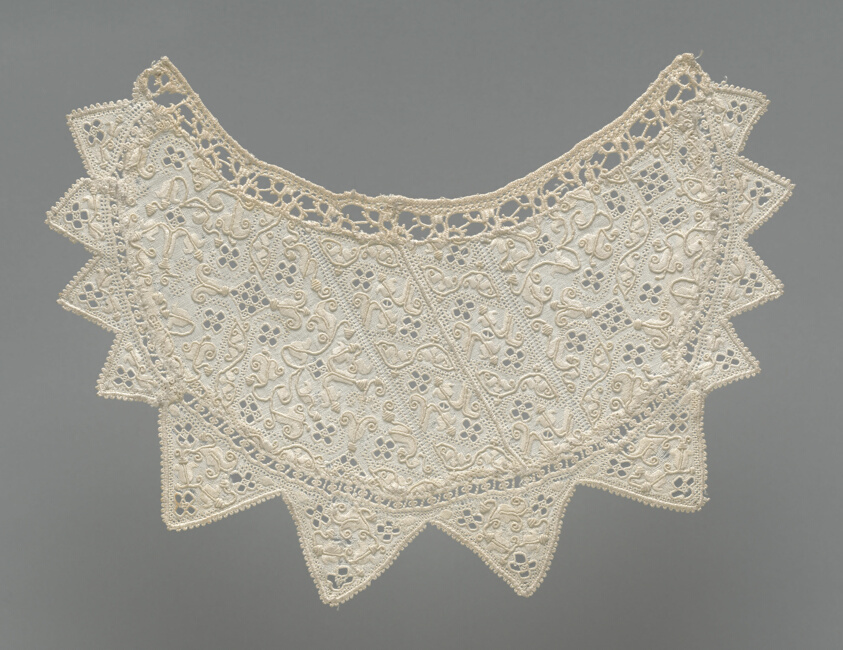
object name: Textile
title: Pair of Cuffs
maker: Italy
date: 1525/50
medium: Linen, plain weave; cut and drawn work in interlocking lace and overcast stitches; darned and overcast bars; buttonhole ring picots; embroidered in bullion, buttonhole, double faggot, double hem, overcast back, overcast and satin stitches; attached edge of plain weave; cut and drawn work in double hem, darning and overcast stitches; buttonhole and overcast bars; bullion picots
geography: Italy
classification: textile; costume; needlework (visual works)